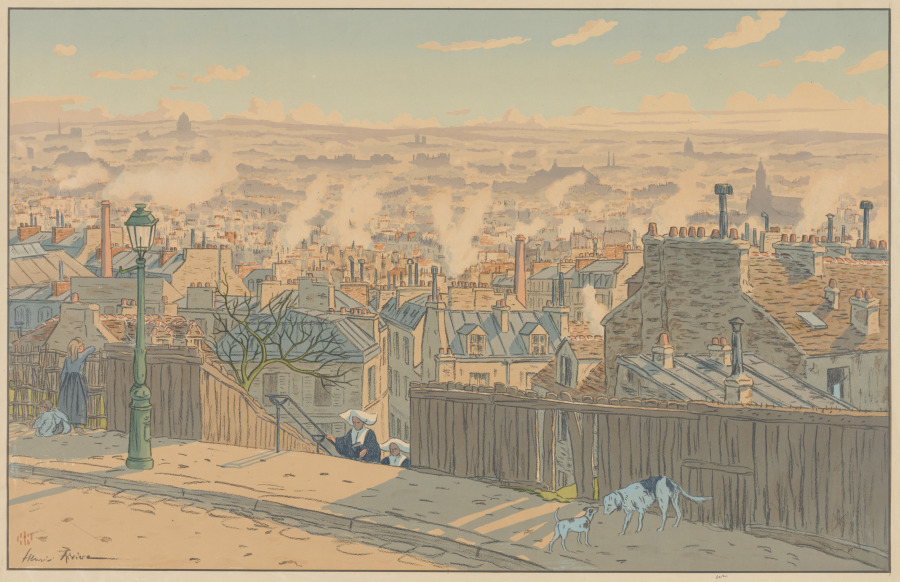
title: Parisian Landscapes: Paris seen from Montmartre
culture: France, early 20th century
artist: Henri Rivière (French, 1864–1951)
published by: Printed by Verneau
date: 1900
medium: color lithograph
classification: Print